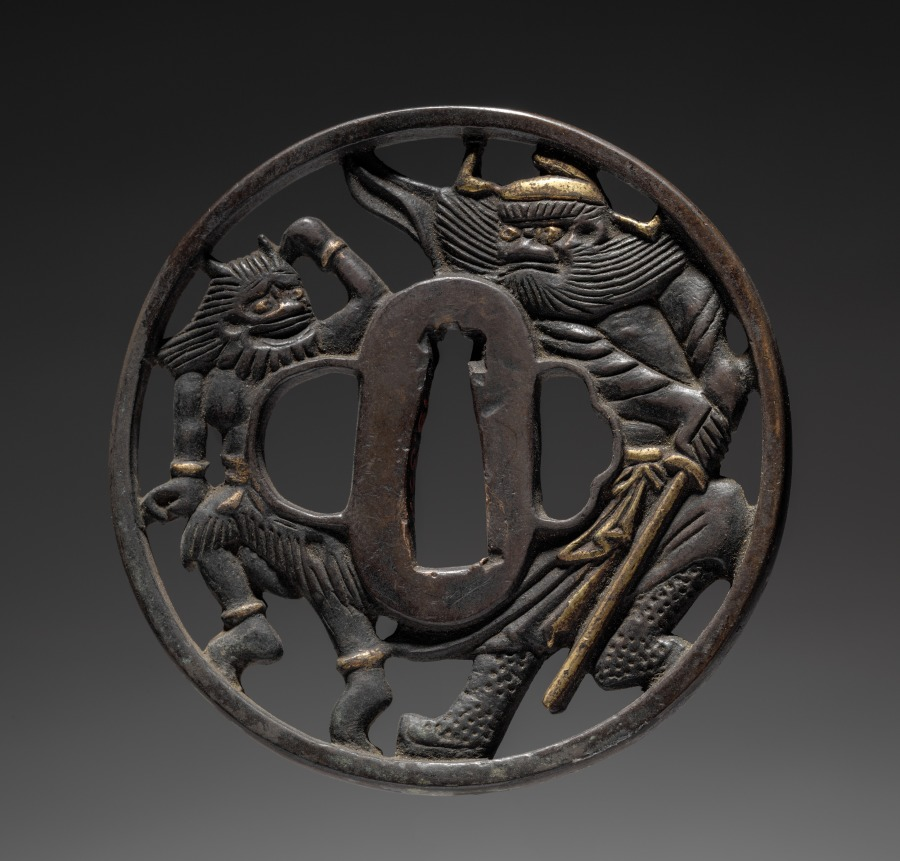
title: Sword Guard (Tsuba) with Zhong Kui (Shōki) the Demon Queller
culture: Japan, possibly Edo period (1615-1868)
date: c. 1615–1868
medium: iron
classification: Arms and Armor